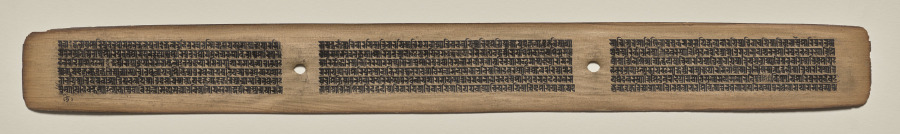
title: Text, Folio 79 (recto), from a Manuscript of the Perfection of Wisdom in Eight Thousand Lines (Ashtasahasrika Prajnaparamita-sutra)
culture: Eastern India, Bihar, Vikramashila Monastery. Painting: Nepal, Kathmandu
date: Sunday, September 14, 1119 (year 239 of the Newar Samvat in the month of Ashvina)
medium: gum tempera and ink on palm leaves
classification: Painting